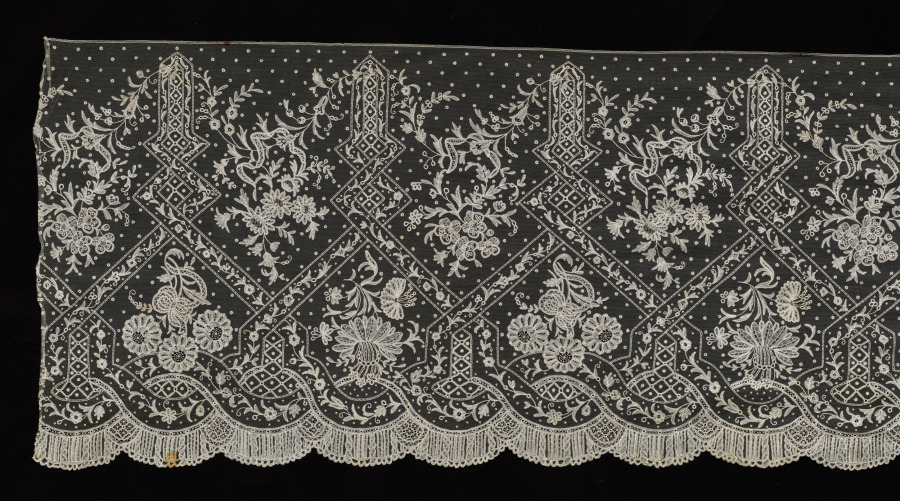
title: Lace Flounce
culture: Belgium, Brussels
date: 1811–99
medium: Machine-made lace net ground with bobbin lace appliqué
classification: Lace